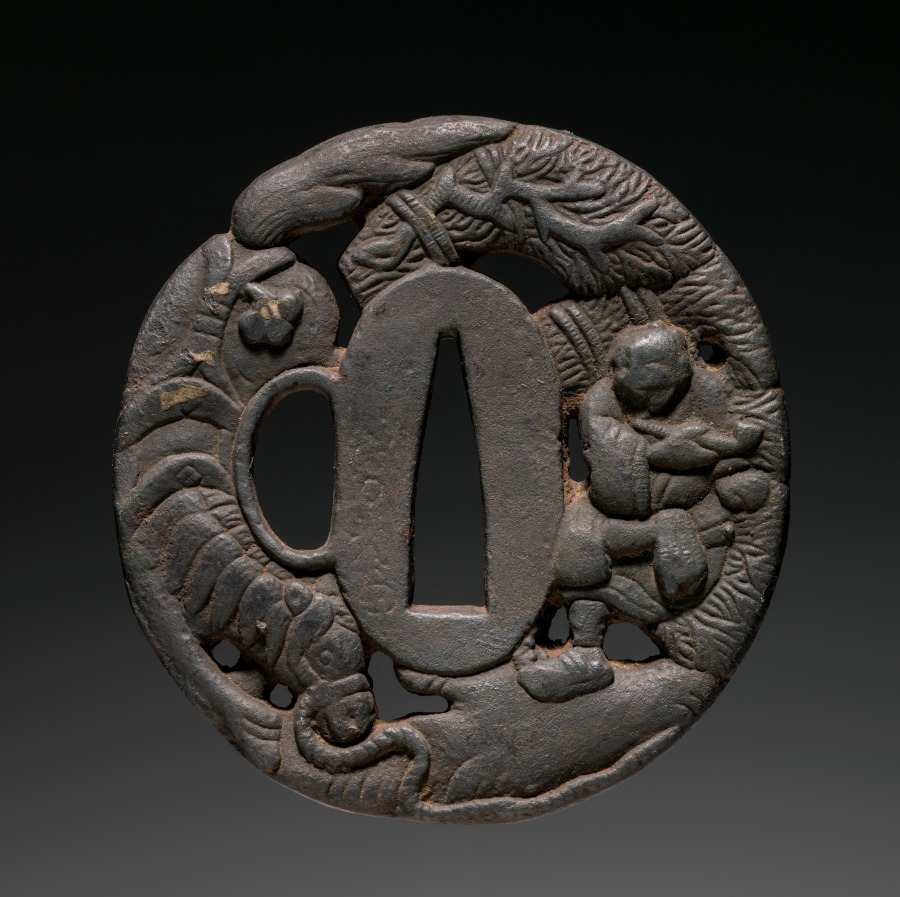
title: Sword Guard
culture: Japan, Edo period (1615–1868)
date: early to mid-1800s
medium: iron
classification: Arms and Armor